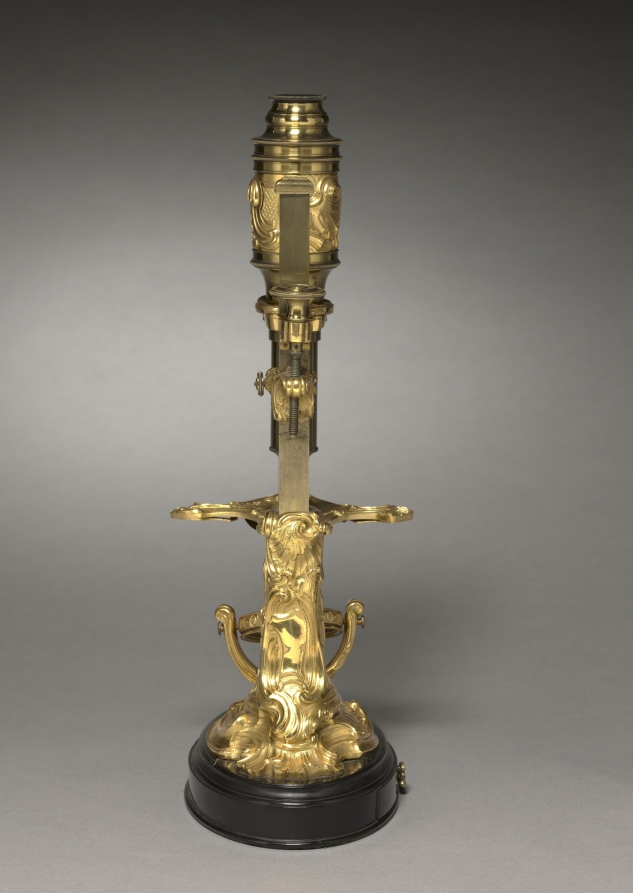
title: Microscope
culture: France, mid-18th century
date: c. 1745– 1765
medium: gilt bronze mounts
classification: Metalwork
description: Composed of elaborate gold-plated parts, this microscope is not just a decorative work of art; it is also a functional tool for scientific inquiry. Its ornamentation reflects the intermingling of art and science during the European Enlightenment, an era when scholars emphasized the study of science and reason as a means of social and intellectual progress. The two lenses of a compound microscope allow for better focus and magnification, making it easier for scientists—amateur and professional alike—to look closer at a specimen to see more than can be seen by the naked eye. This microscope’s ornate decoration suggests it was probably owned by a wealthy person, possibly an amateur scientist. A version of an 18th-century English poem playfully describes what can be newly seen with a microscope: Great fleas have little fleas Upon their backs to bite ’em The little fleas have lesser fleas And so ad infinitum.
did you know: Microscopes, especially ones as elaborate as this example, were luxurious symbols of enlightened aristocratic sophistication in the 1700s.